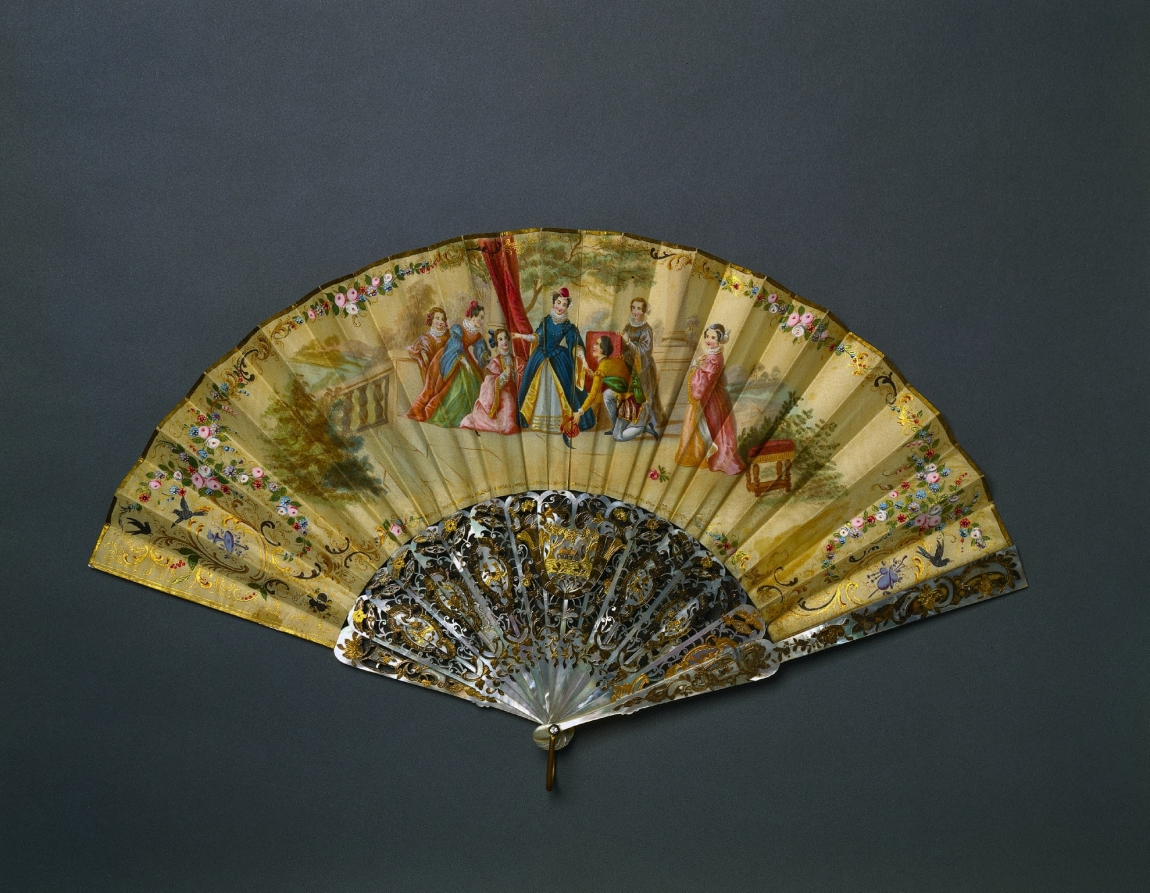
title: Fan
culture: France(?)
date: c. 1840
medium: carved and gilded pearl sticks, gouache on silk leaf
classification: Miscellaneous